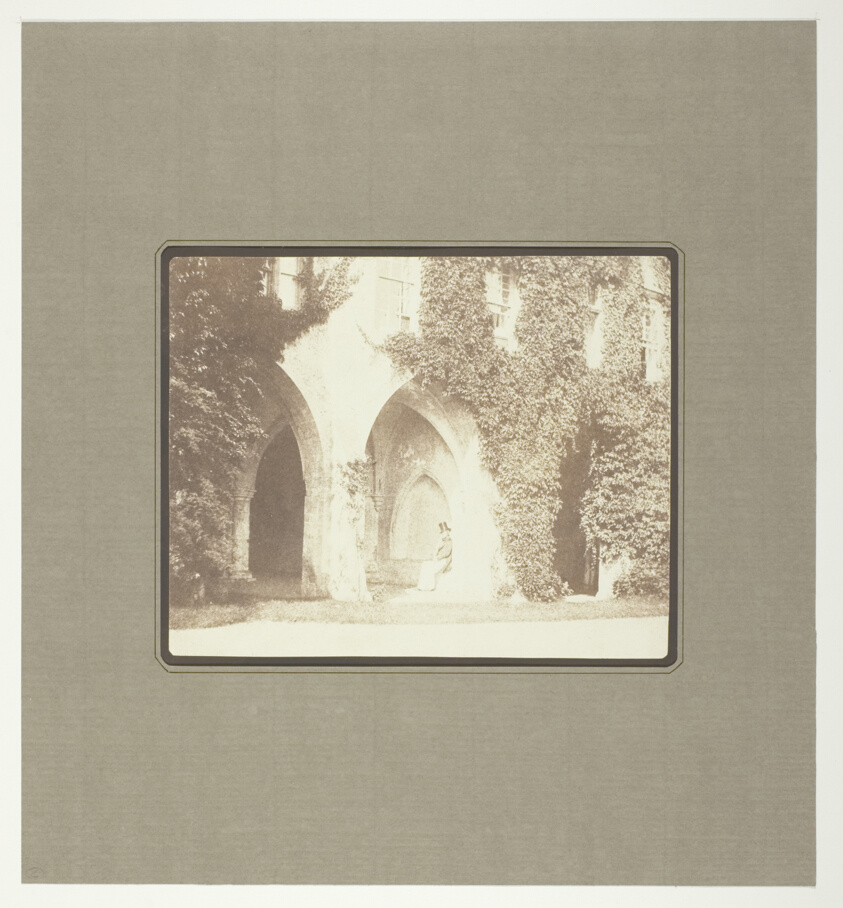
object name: Photograph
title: The Ancient Vestry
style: 19th century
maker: William Henry Fox Talbot (English, 1800–1877)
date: September 1845 ?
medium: Salted paper print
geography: England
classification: salted paper print; photographic process; photography; photograph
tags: Collected by Hugh Edwards